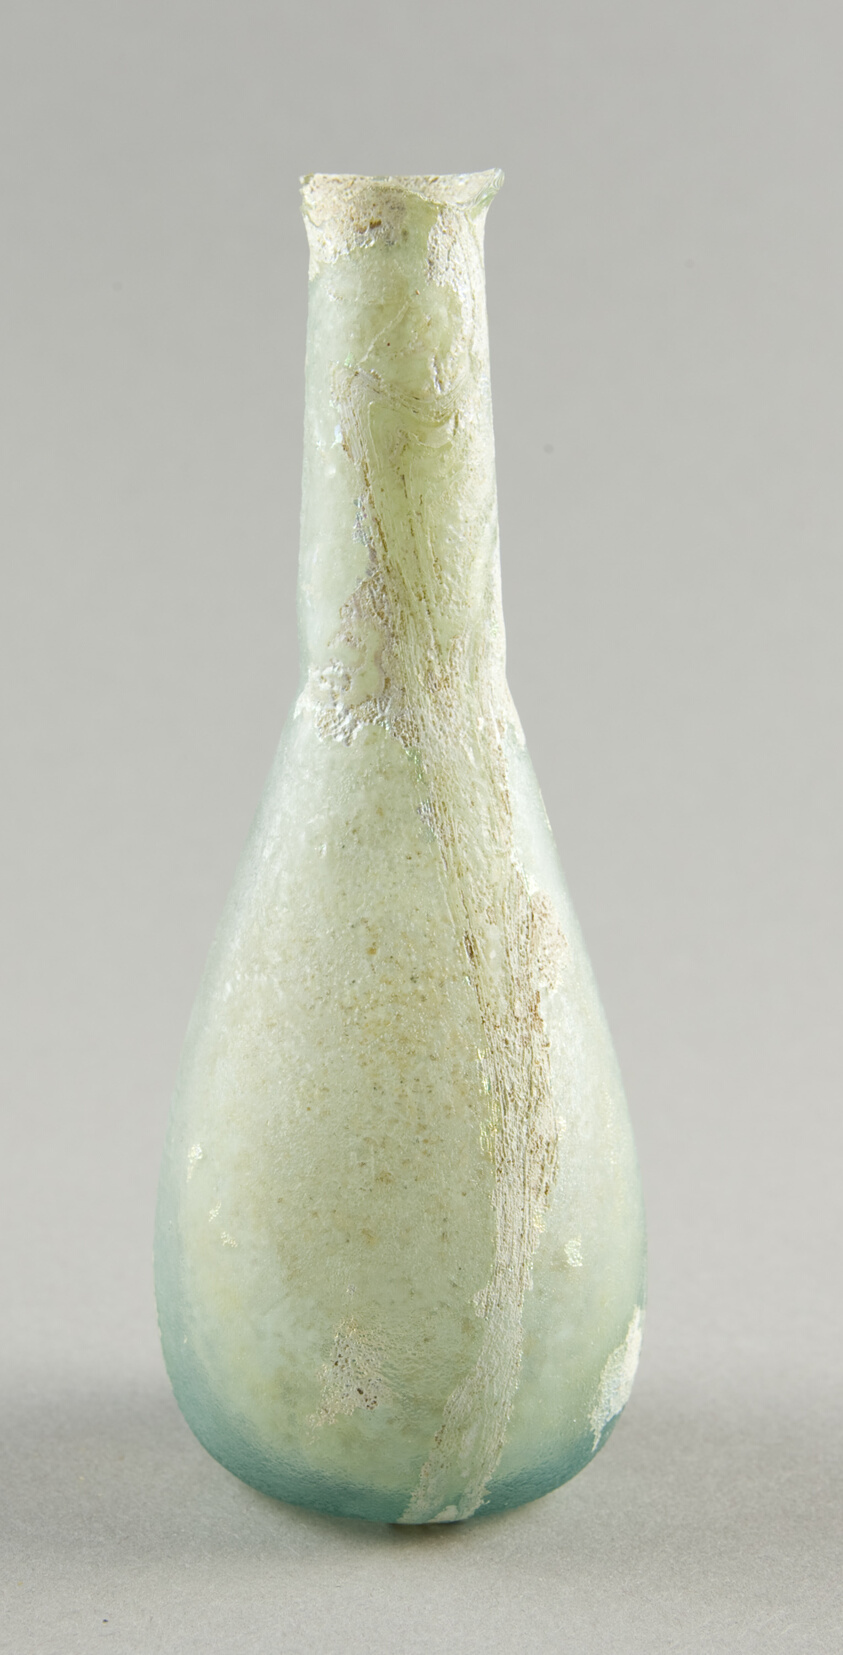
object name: Vessel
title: Bottle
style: syrian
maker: Roman, Levant or Syria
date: 1st-5th century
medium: Glass, blown technique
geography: Syria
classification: bottle; glass; vessel; ancient art